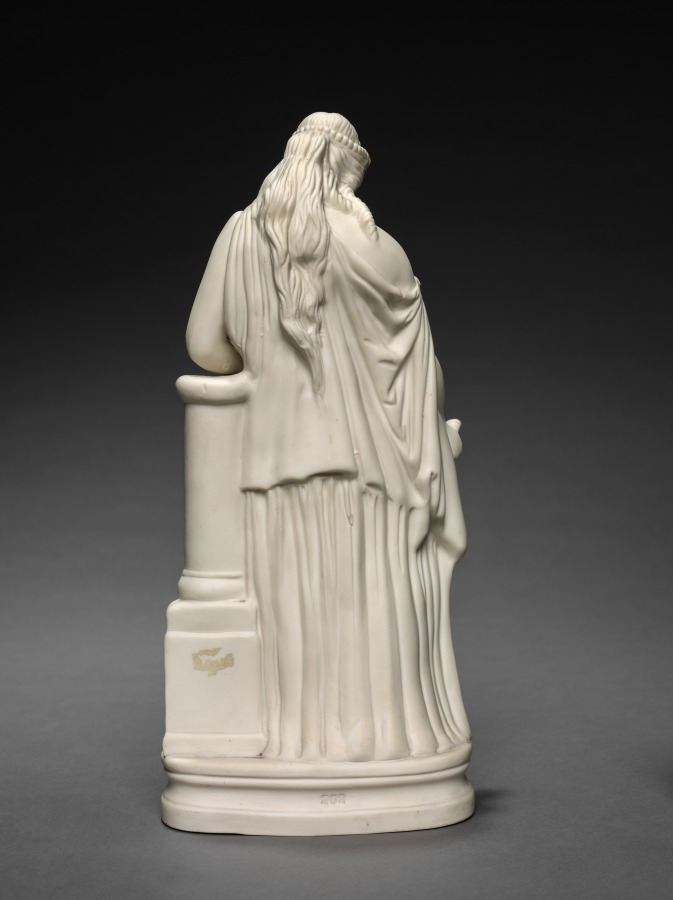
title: Figure of Medea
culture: England, 19th century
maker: W. T. Copeland & Sons (British)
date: c. 1870–1890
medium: Parian porcelain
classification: Ceramic